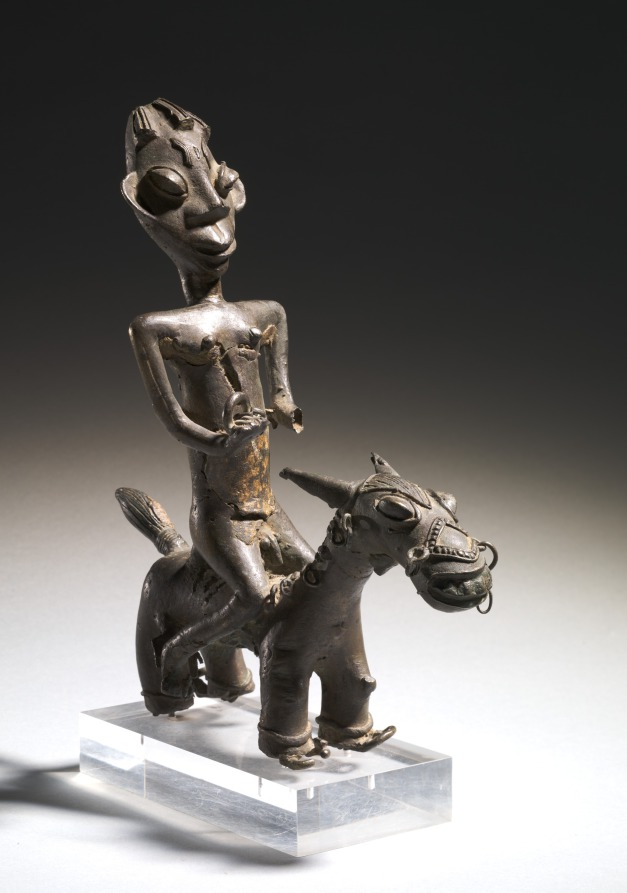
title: Altar figure (onílé)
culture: Africa, West Africa, Nigeria, Yorùbá-style maker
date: possibly 1700s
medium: Copper alloy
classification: Sculpture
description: This figure of a horse and rider is related to the Ògbóni society, whose responsibilities include the burial of titleholders and leaders and the judgment and punishment of criminals. A counterweight to the authority of the king, it is also responsible for the selection, installation, and removal of rulers. Probably once forming a pair with a female figure, the equestrian symbolized the king’s male ancestors.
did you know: Images of horses and riders cast in copper alloy are rare among Yoruba sculptures.